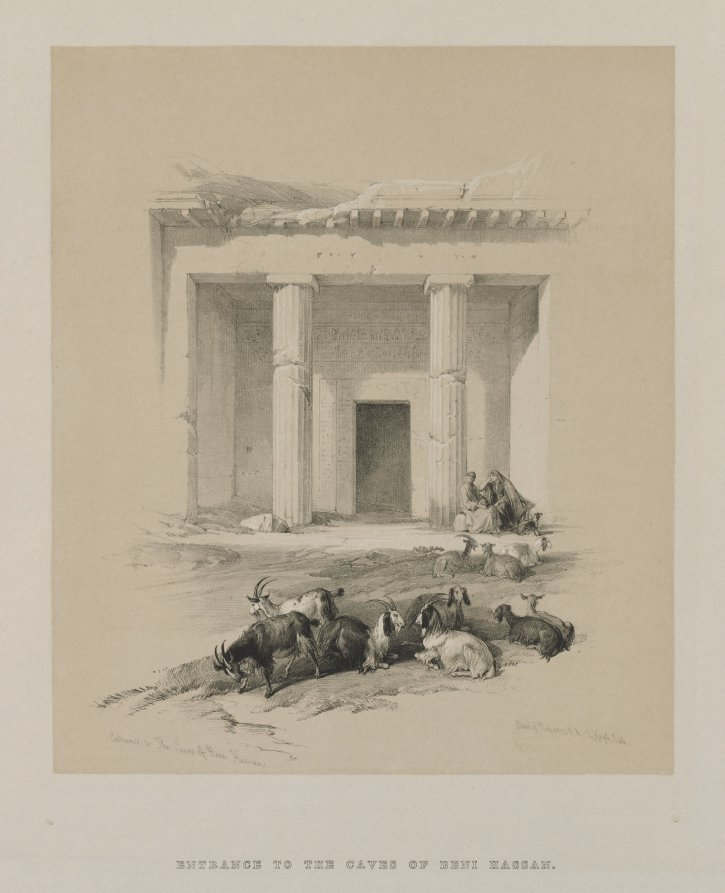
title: Egypt and Nubia, Volume I: Entrance to the Caves of Beni-Hasan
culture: England, 19th century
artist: Louis Haghe (British, 1806–1885)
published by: F. G. Moon, 20 Threadneedle Street, London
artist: after David Roberts (Scottish, 1796–1864)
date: 1847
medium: color lithograph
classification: Print